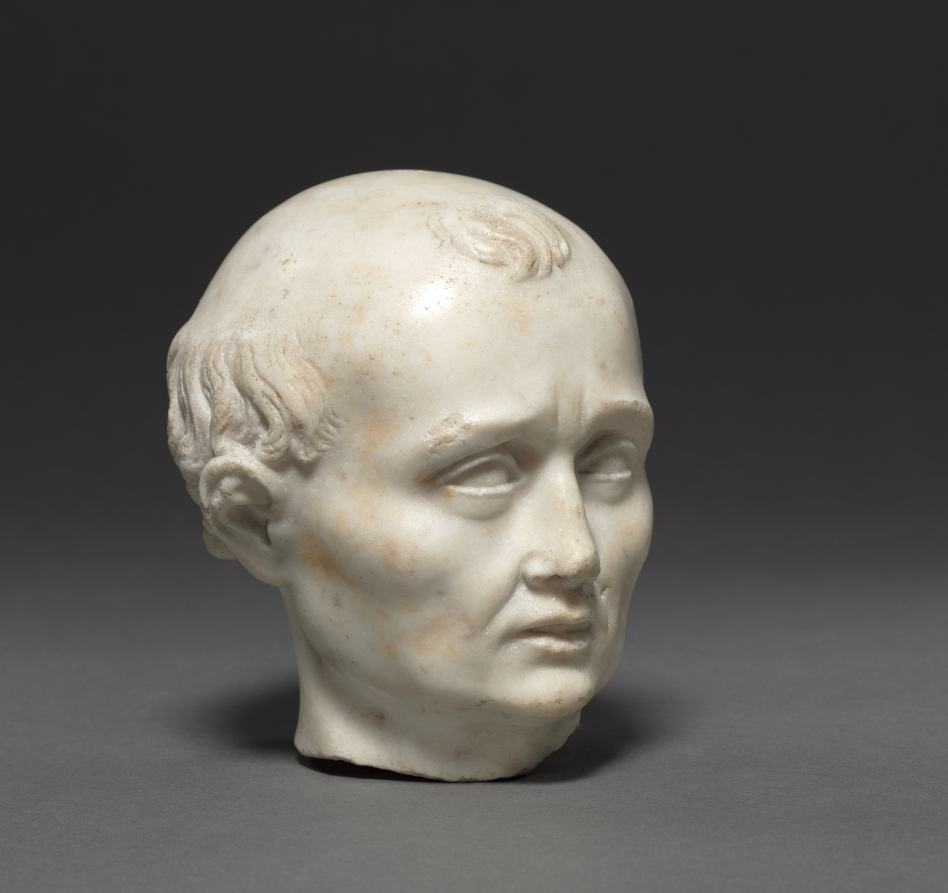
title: Head of a Man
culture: France, 15th century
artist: circle of Michel Colombe (French, c. 1430–c. 1513)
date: 1520–1525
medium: marble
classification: Sculpture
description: The original context and function of these two marble heads are unknown. They are presumed to have been part of a relief sculpture from a château, perhaps in the Loire region, or else from a tomb sculpture. Their style is reminiscent of sculptures produced by Michel Colombe, a prominent sculptor active in the Loire Valley in the service of aristocratic and royal patrons, and may have been carved by a close follower or member of his workshop.